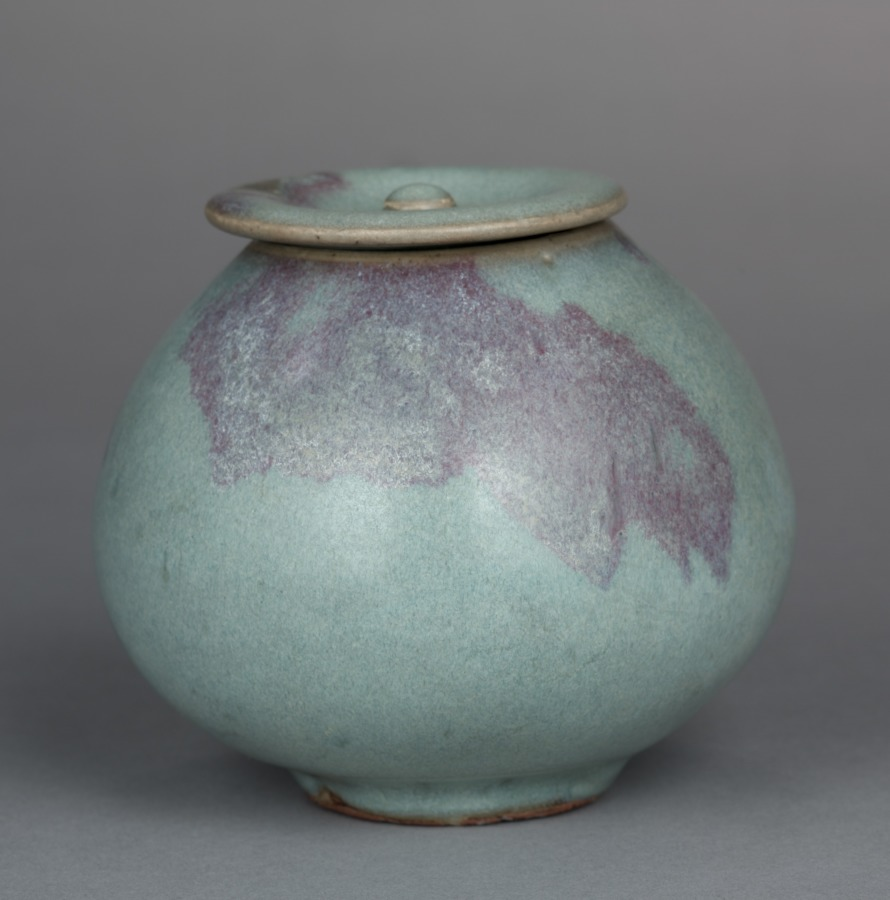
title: Jar with Cover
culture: China, Henan province, Yuxian, Northern Song dynasty (960-1127) or Jin dynasty (1115-1234)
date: 1100s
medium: porcelaneous stoneware with blue glaze and splashes of purple, Jun ware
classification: Ceramic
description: The beauty of Jun ware lies in its spectacular glaze effects, which provide immediate visual appeal. The glaze that is thickly applied onto the heavily potted body also lends the vessel a sense of volume. As shown here, its glaze colors range from soft milky-blue to rose-purple. The purple suffusions are created by splashing or brushing copper-rich pigments onto the glaze before firing. The merging of purple splashes with opalescent blue glaze displays rich tonal variations, resembling purplish glows at sunset.